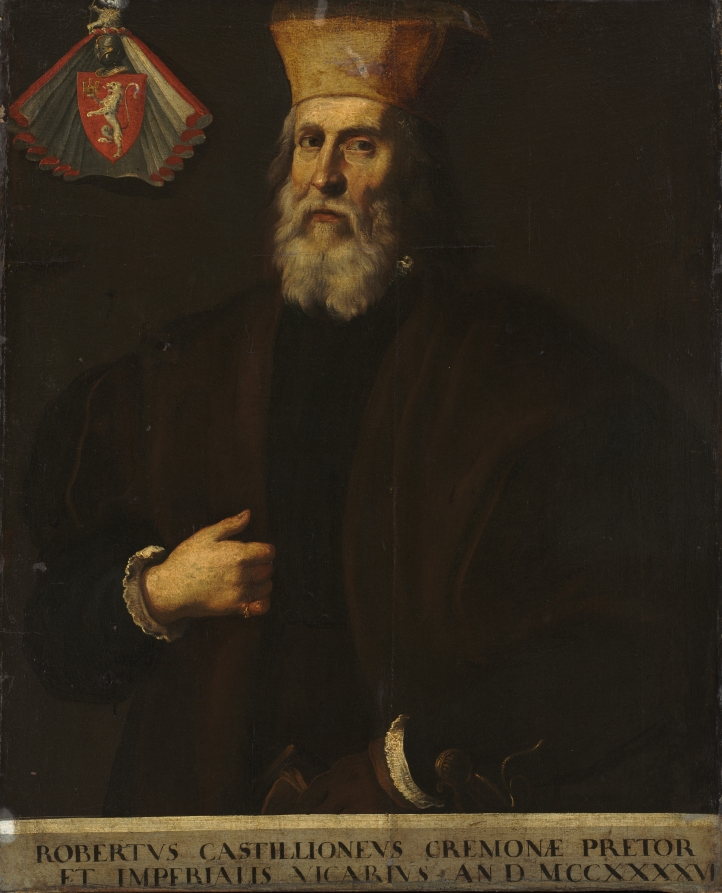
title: Portrait of Roberto Castiglione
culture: Italy, Cremona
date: early 1600s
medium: oil on canvas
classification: Painting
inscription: inscribed at bottom: ROBERTUS CASTILLIONEUS CREMONAE PRETOR ET IMPERIALIS VICARIUS AN D MCCXXXXVI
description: The inscription on the bottom of this painting identifies the sitter of this commemorative portrait as Roberto Castiglione, a magistrate and imperial vicar for the Spanish empire in the 1200s. His identity is further supported by the coat of arms in the upper left. A red shield ornamented by a lion holding a castle with three towers in his right paw, the crest belongs to the Castiglione family, which was primarily based in Milan, but had branches in Cremona as well. His gloved left hand holds a prayer book and the glove for his bare right hand, which holds back the fur trim of his mantle.